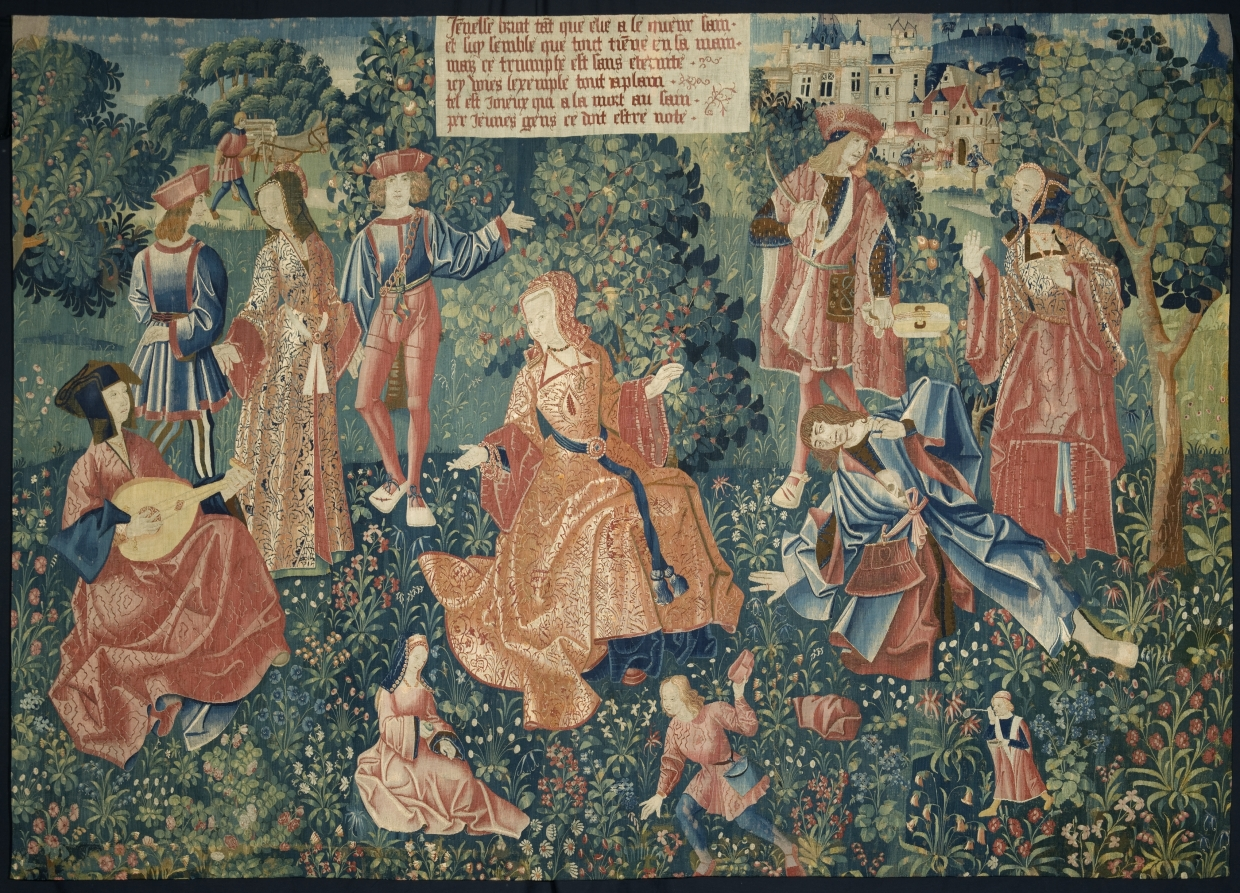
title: Youth (from Chateau de Chaumont set)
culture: France, Lyon(?), early 16th century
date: 1512–15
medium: silk and wool; tapestry weave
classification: Tapestry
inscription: French verse in Gothic letters translates as follows: Youth triumphs while its heart is healthy, And when it seems to hold all in its hand. But this triumph is without eternity. Here one sees the example full well: Those who are happy hide death in thier heart. Let the young heed this warning.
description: Louise of Savoy (1476-1531), queen mother of King Francis I, is depicted here in a sumptuous brocaded velvet in the center. She addresses youthful figures including Éléonore, Pierre Sala’s daughter who is facing her future husband, Hector. On the right, King Louis XII (died 1514) stands in front of the Chateau Langais where he had married Anne of Brittany. Above is Hector’s deceased father with a partially concealed skull under his robe, while a woman expresses surprise at the sight. The verse in Old French at the top states that youthful happiness is not eternal: Youth makes sounds as long as its heart is healthy, And thinks that it holds all in its hand. But this triumph is not eternal. Here you see clearly an example: He that is happy has death in his breast. Of this you people should take note.